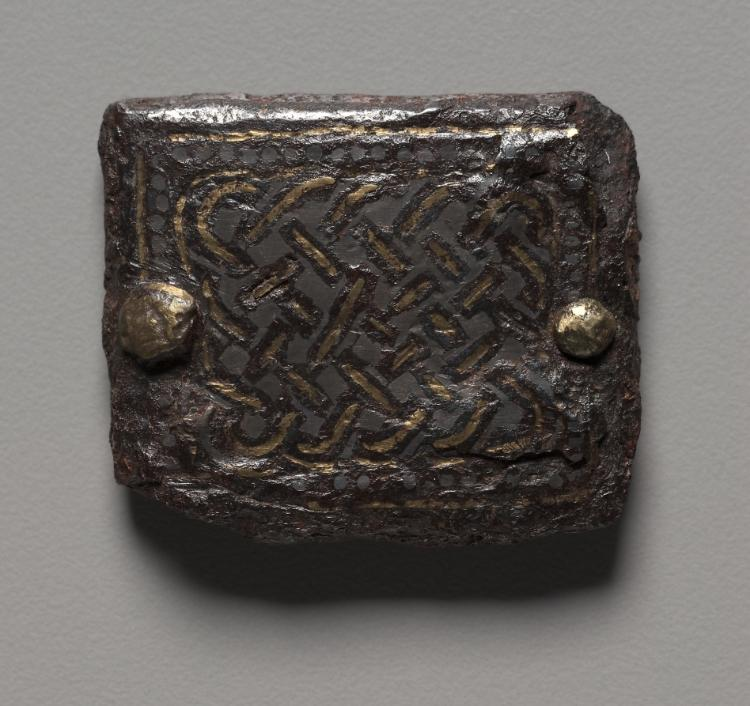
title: Plaque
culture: Merovingian, Burgundian, Migration period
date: 600s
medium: iron inlaid with gold and silver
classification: Jewelry